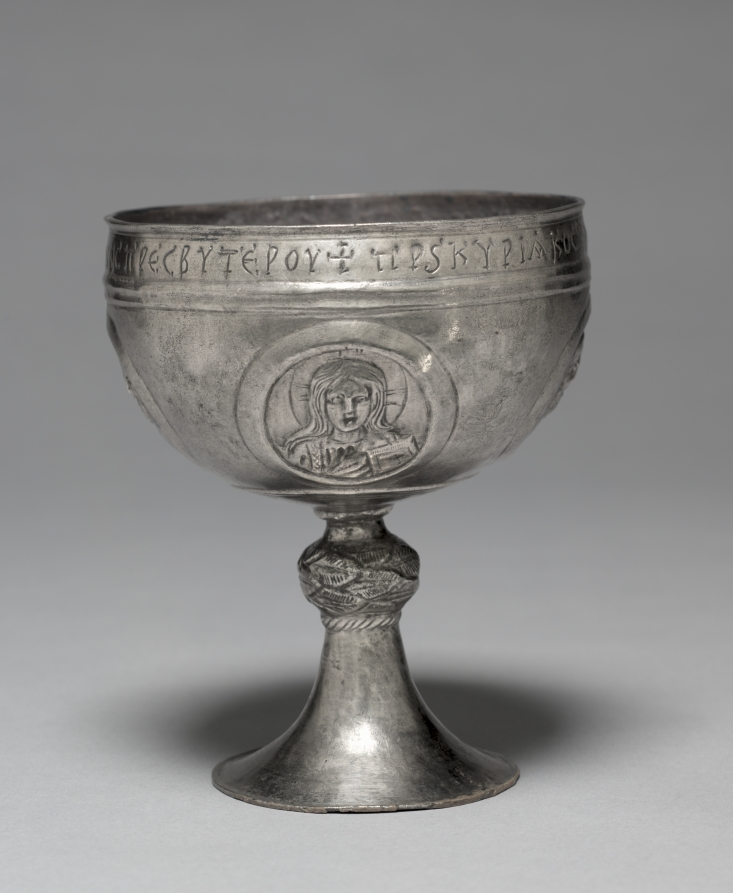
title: Chalice from the Beth Misona Treasure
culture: early Byzantium, Constantinople or Syria, Byzantine period, 6th-7th Century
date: c. 500–700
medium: silver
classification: Metalwork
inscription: the Greek inscription at the top, under an engraved line translates as: + The priest, KYRIAKOS, son of DOMNOS, (gave this chalice) to St. Sergios, in the time of Zeno the priest.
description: These four liturgical silver vessels—a paten and three chalices (1950.378–81)—form what is now called the Beth Misona Treasure, named for the village in northern Syria for which the objects were made. While nothing is known about the exact location and circumstances of the treasure's discovery, the people of the village of Beth Misona were, like other Christian communities in Syria and Palestine, probably forced to bury their church silver to hide it from the Persians or Arabs, who conquered their lands in the first half of the 600s. The paten, which held pieces of Eucharistic bread used during Mass, is decorated with an engraved Latin cross surrounded by a dedicatory inscription that names the paten's donor—Domnos—and its original location, the church of Saint Sergios in Beth Misona. The chalices, which contained the Eucharistic wine used during Mass, feature broad cups decorated with portrait busts of Saints Peter and Paul, Christ, and the Virgin. One chalice bears a dedicatory inscription naming its donor—Kyriakos, Domnos's son—and the priest of the church that received the pious gift—Zeno.